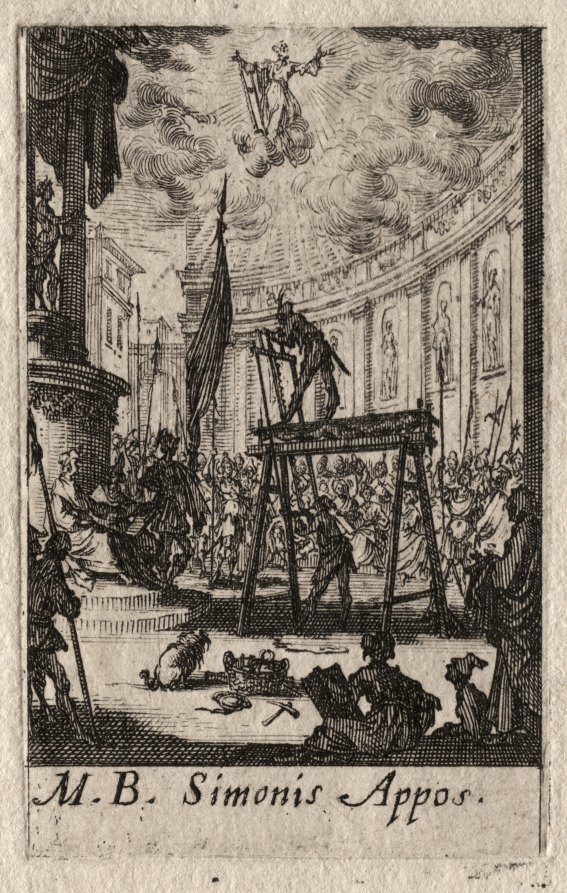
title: The Martyrdom of the Apostles: St. Simon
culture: France, 17th century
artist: Jacques Callot (French, 1592–1635)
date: ca. 1632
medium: etching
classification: Print